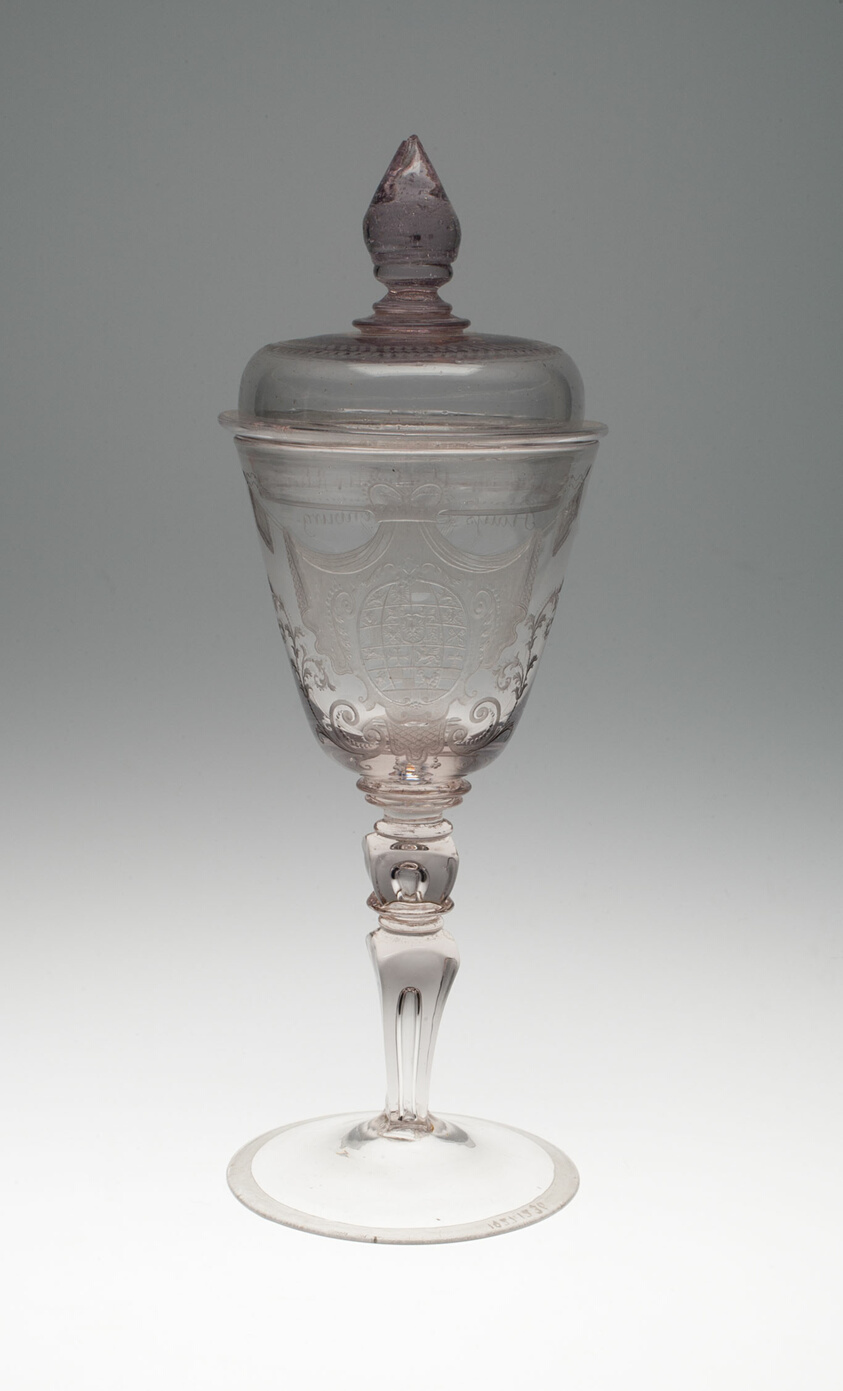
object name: Glass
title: Goblet with Cover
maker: Germany, Thuringia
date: c. 1720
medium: Glass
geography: Thuringia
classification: drinking vessel; glass; european decorative arts